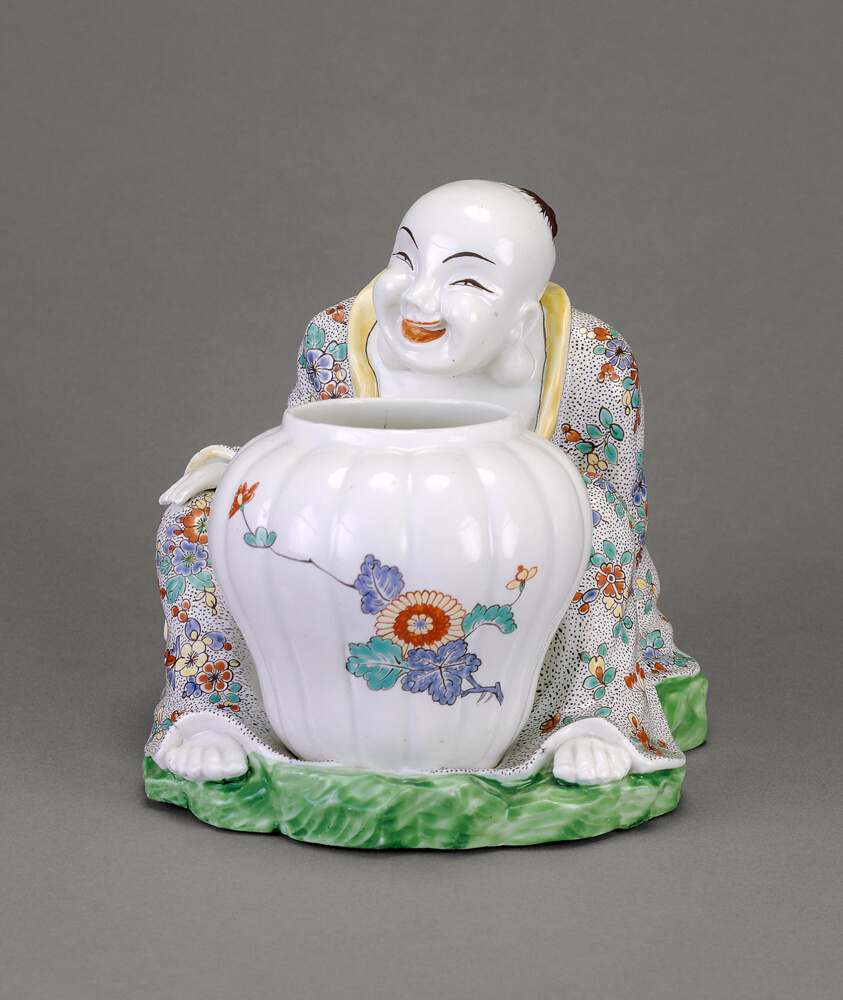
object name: Ceramics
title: Seated Figure and Potpourri Vase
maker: Chantilly Factory (France, 1730-92)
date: c. 1740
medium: Soft-paste porcelain, tin-glaze, and polychrome enamels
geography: Chantilly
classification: vase; vessel; porcelain; ceramics; european decorative arts